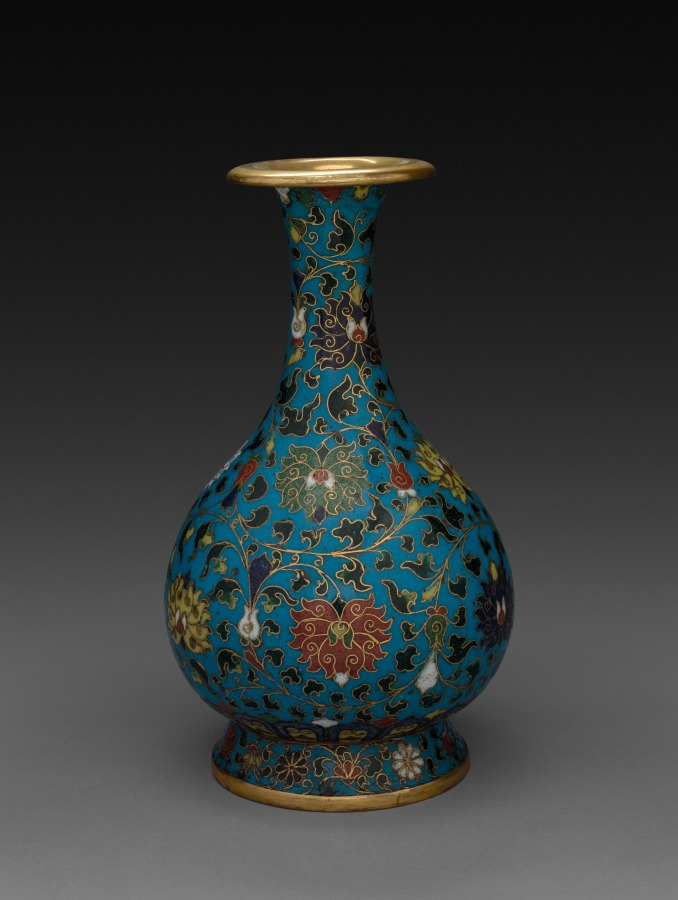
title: Vase with Floral Scrolls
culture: China, Ming dynasty (1368–1644)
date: 1600s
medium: cloisonné enamel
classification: Enamel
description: In cloisonné enameling, the decorative patterns are outlined by soldering metal wires (usually copper) to a metal base, creating a network of cells, or cloisons, to be filled with powdered enamels. Here. a turquoise ground separates the stylized chrysanthemum flower and leaf pattern, which winds around the neck and body. After firing, the enamels are polished to create a smooth surface level with the cloisons. The exposed metal surfaces are gilt.